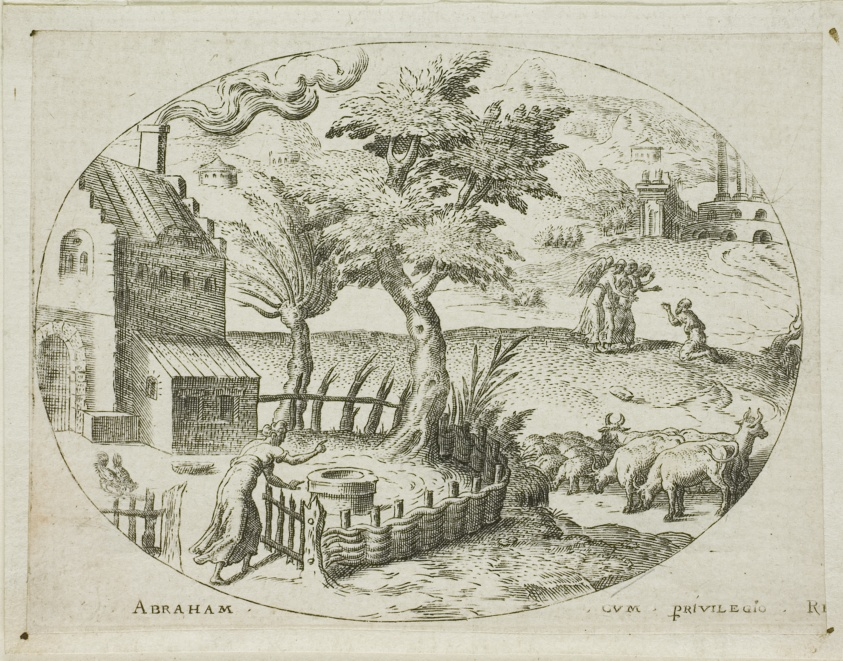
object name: Print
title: Abraham Receiving the Three Angels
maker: Etienne Delaune; French, c. 1519-1583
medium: Engraving on paper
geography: France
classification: engraving; print; prints and drawing